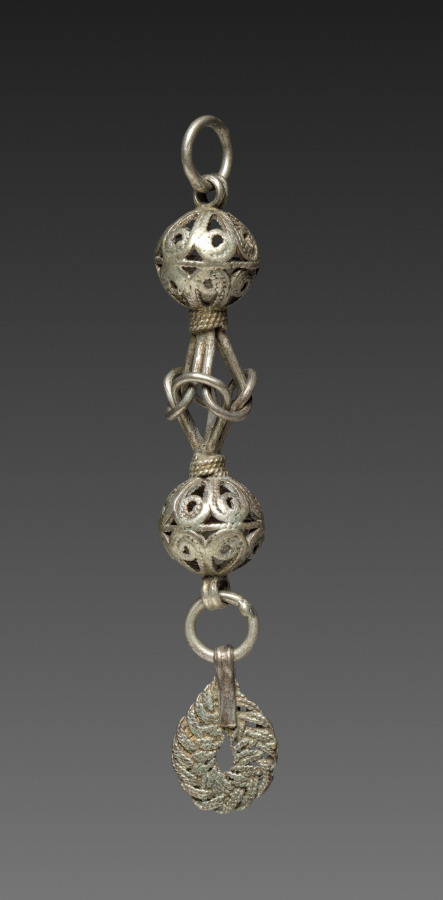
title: Button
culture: Balkans, 19th century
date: 1800s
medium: silver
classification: Jewelry